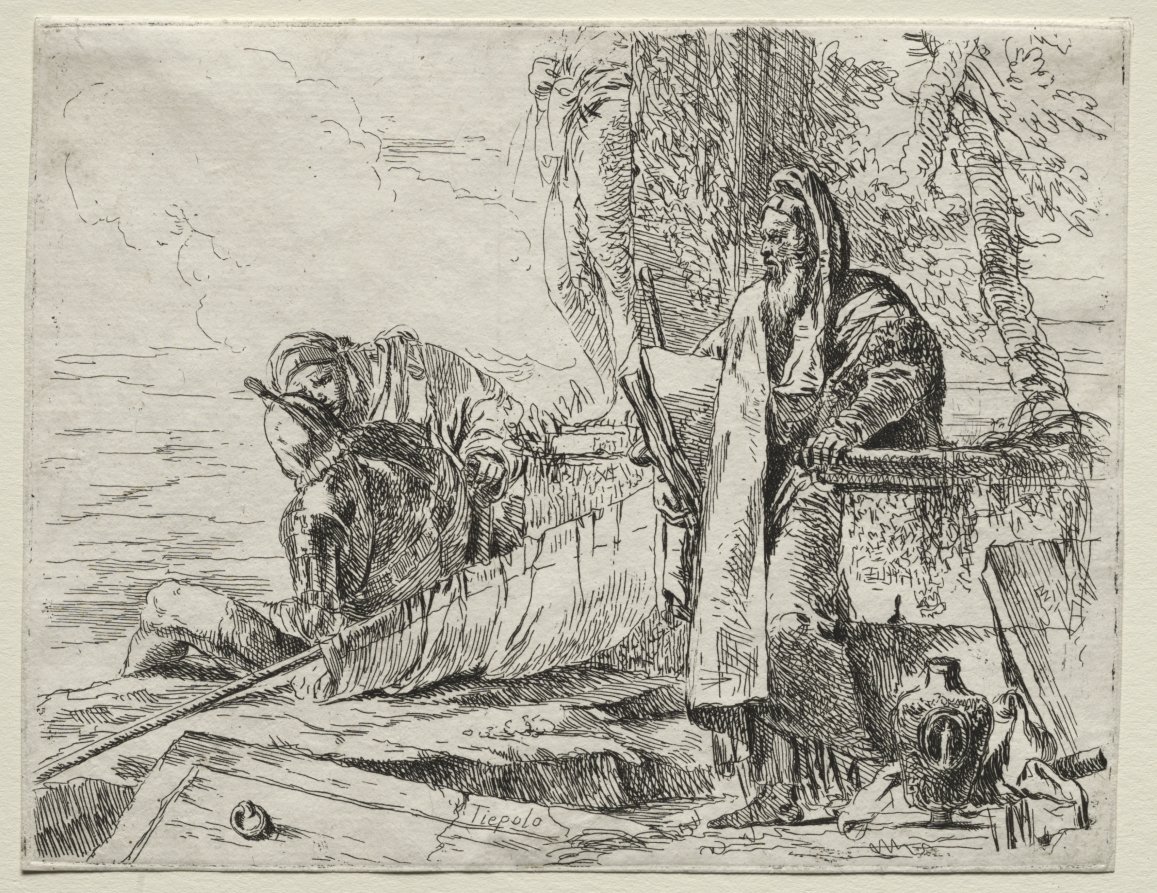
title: Various Caprices: The Philosopher Holding a Book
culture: Italy, 18th century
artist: Giovanni Battista Tiepolo (Italian, 1696–1770)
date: 1735–50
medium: etching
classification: Print